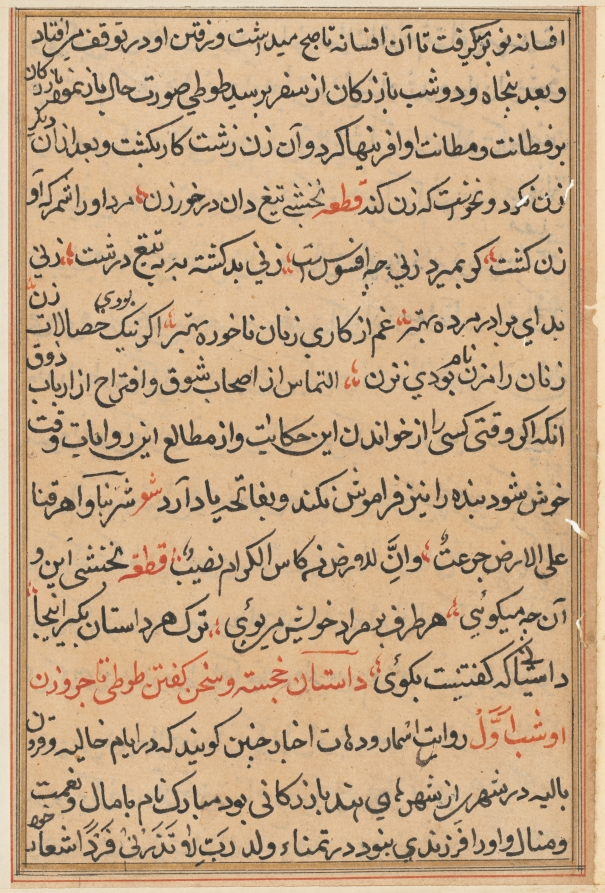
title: Page from Tales of a Parrot (Tuti-nama): text page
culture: Mughal India, court of Akbar (reigned 1556–1605)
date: c. 1560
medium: gum tempera, ink, and gold on paper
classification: Painting